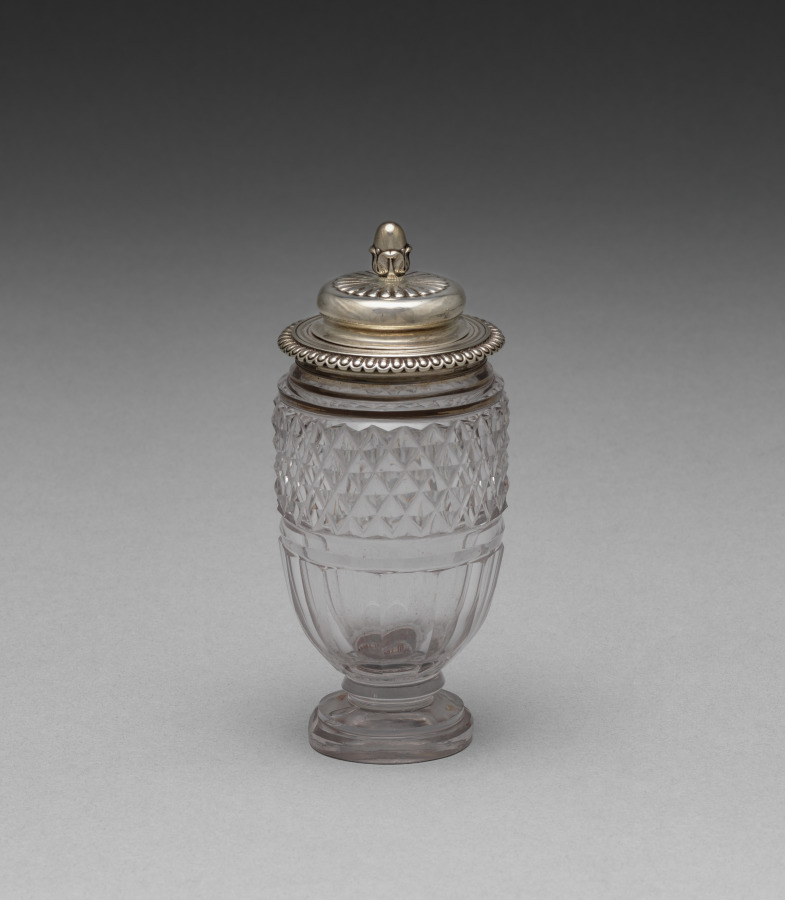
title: Covered Pot (1 of 2)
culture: England, 19th century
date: 1817–18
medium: cut glass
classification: Glass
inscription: Stamped on vessel rim: "PS", George III duty mark, Lion Passant, "b".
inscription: Stamped on lid: "PS", Lion Passant, "b".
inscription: Scratched on base of vessel: "3136".